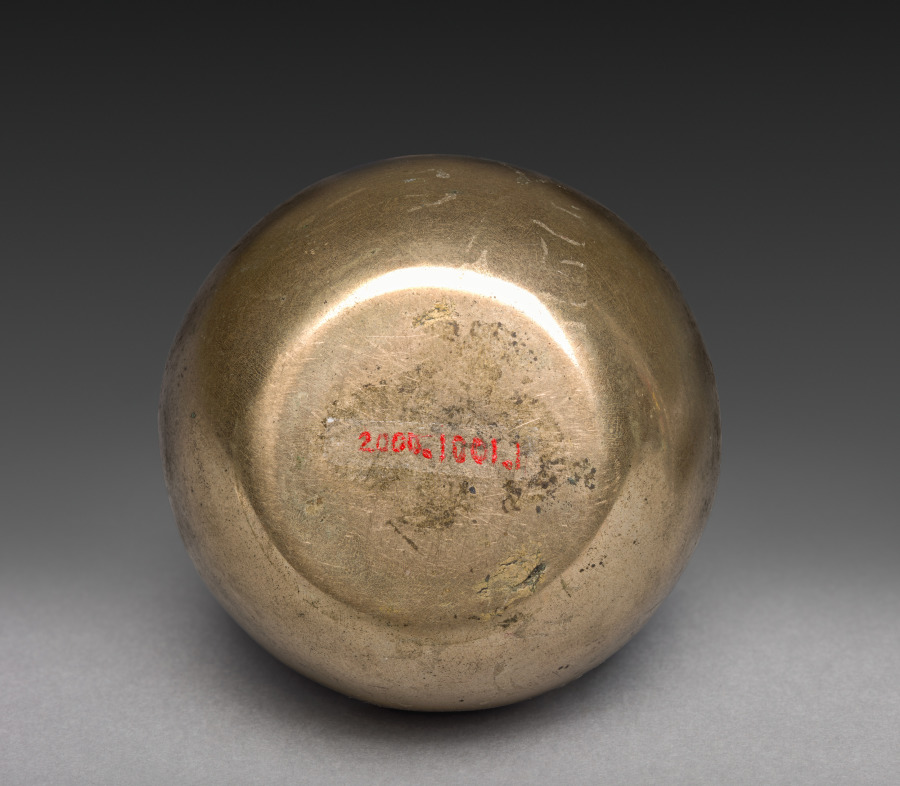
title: Wine Cup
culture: North Korea, Yochon, unassigned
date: unassigned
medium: brass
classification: Metalwork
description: In ancestor veneration rituals, deceased parents or ancestors are sanctified as spirits who are believed to oversee their descendants. Three times a year, once at the lunar new year, once at the person’s death date, and once at the time of the mid-autumn festival, food would be placed on the table for the ancestors, including fruits, rice, meat, and rice wine. During these ceremonies the worshipers’ attitude was as reverential toward the objects meant to embody the ancestors’ spirits as that toward a living parent. This pair of brass cups may have been used for ancestral rituals to contain rice wine.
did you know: This pair of bronze cups may have been used in family rituals such as ancestral worship ceremonies.